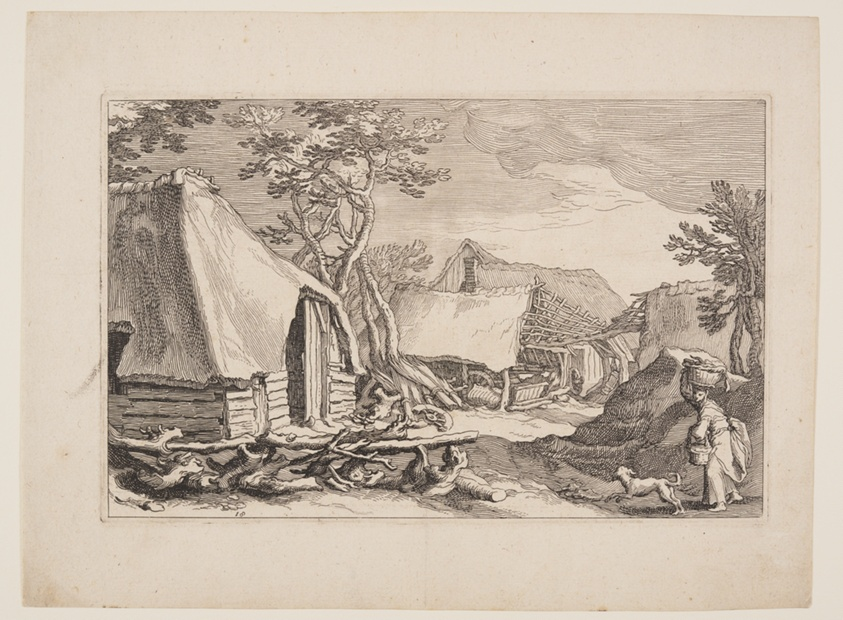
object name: Print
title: Plate 18, from Landscapes with Farmhouses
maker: Boëtius Adamsz. Bolswert (Flemish, 1580–1633); after Abraham Bloemaert (Dutch, 1566–1651)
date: 1614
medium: Etching on ivory laid paper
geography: Flanders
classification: print; paper; prints and drawing; etching